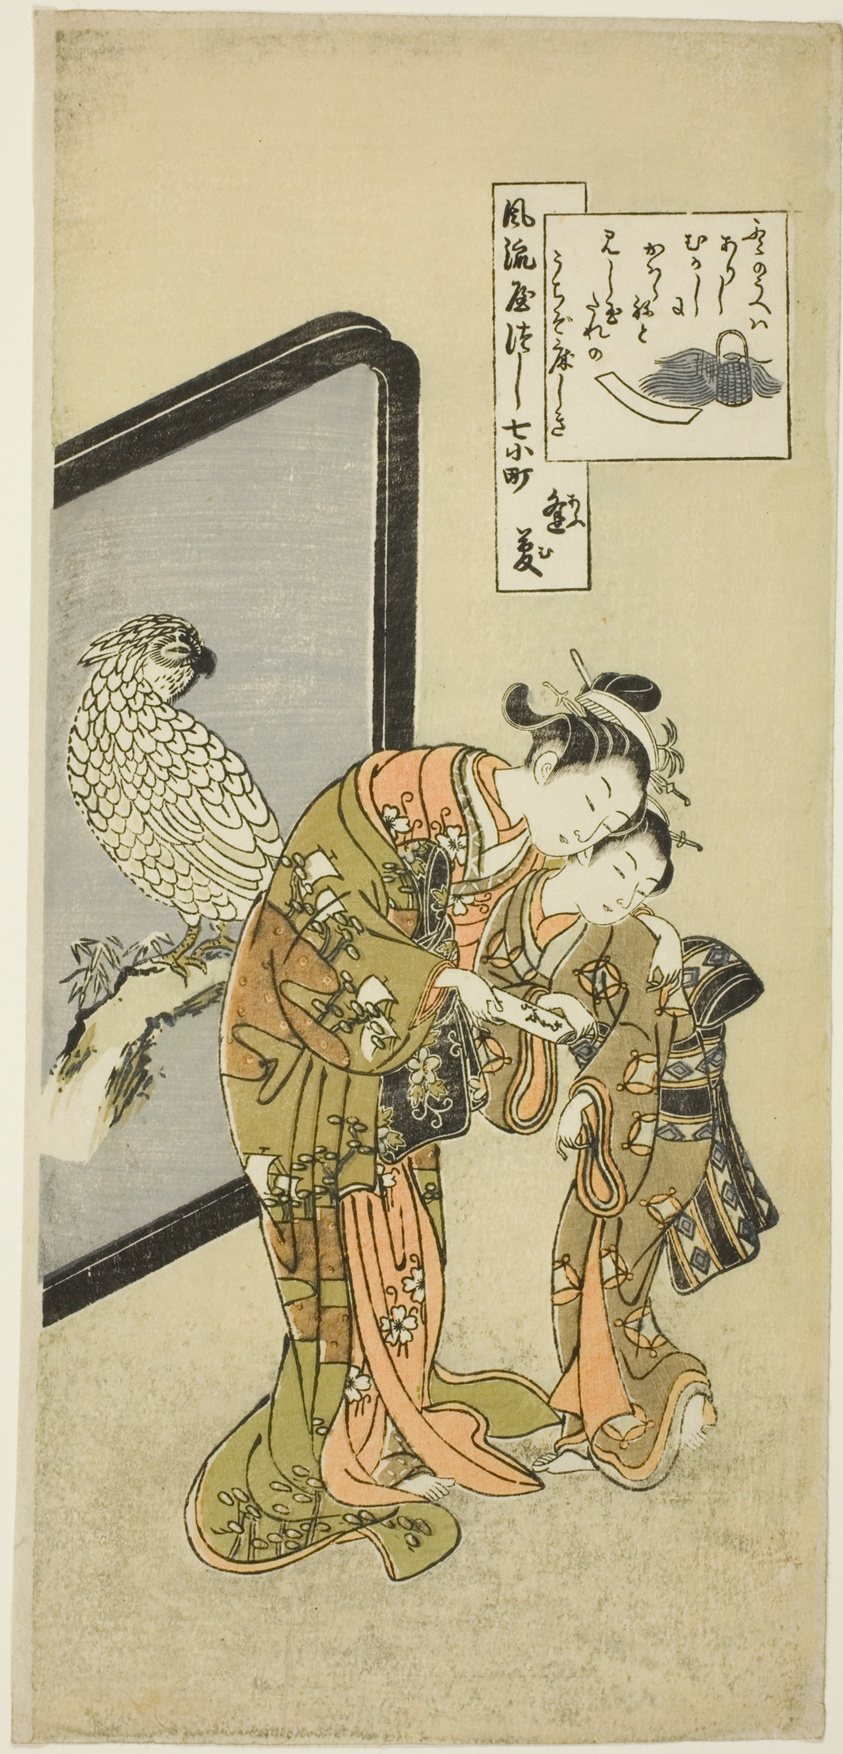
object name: Print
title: Parrot Komachi (Omu Komachi), from the series The Seven Fashionable Aspects of Komachi (Furyu yatsushi nana Komachi)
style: Japanese (culture or style)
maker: Suzuki Harunobu 鈴木 春信; Japanese, 1725 (?)-1770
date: Edo period (1615–1868), 1751/64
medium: Color woodblock print; hosoban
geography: Japan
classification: woodblock print; print; asian art